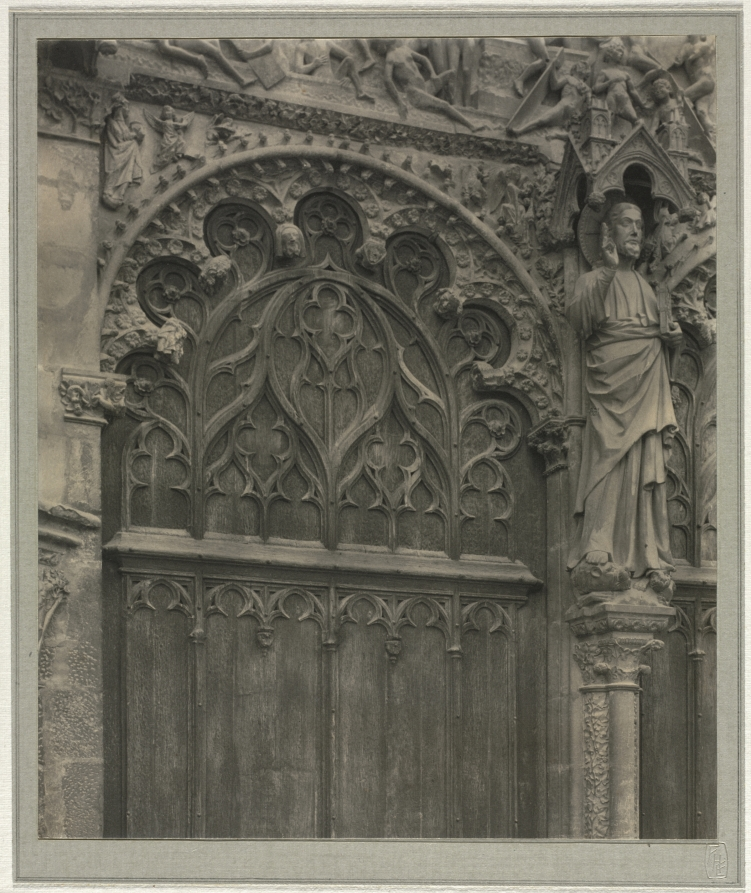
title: Bourges Cathedral: Crypt Under Nave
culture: England, 20th century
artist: Frederick H. Evans (British, 1853–1943)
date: c. 1900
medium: platinum print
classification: Photograph